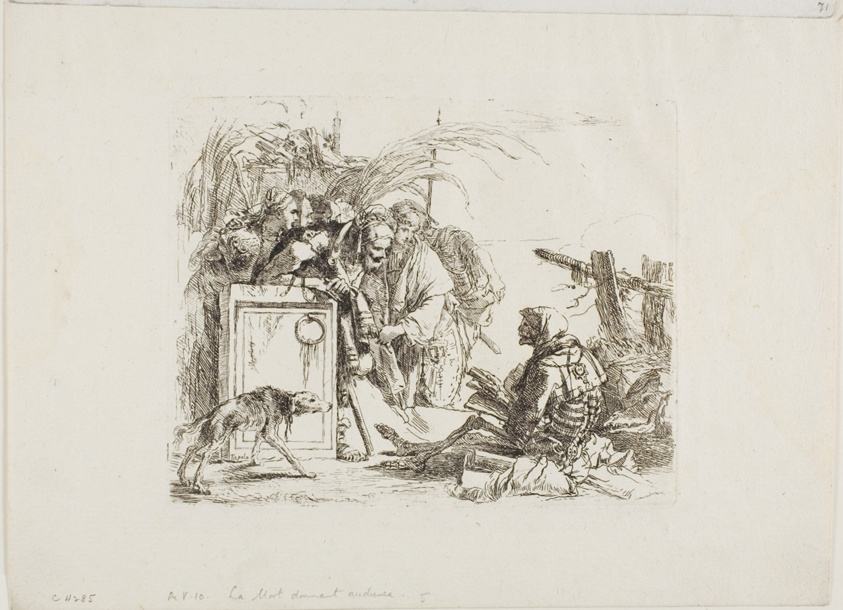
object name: Print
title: Death Giving Audience, from Capricci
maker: Giovanni Battista Tiepolo (Italian, 1696–1770)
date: 1740/50, published 1785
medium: Etching on paper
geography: Italy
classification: etching; print; prints and drawing